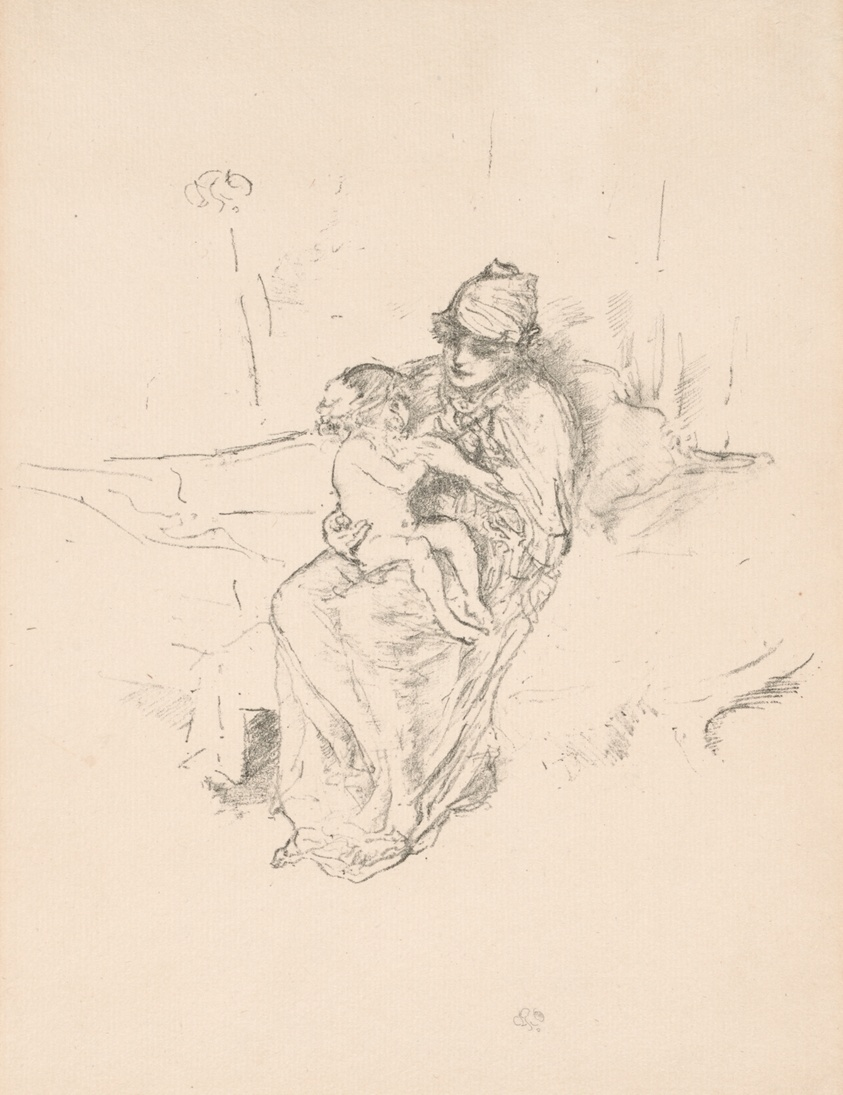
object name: Print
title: Mother and Child, No. 1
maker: James McNeill Whistler (American, 1834-1903)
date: 1891, printed 1895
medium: Transfer lithograph, with scraping and stumping, in black on cream laid paper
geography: United States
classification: transfer lithograph; lithograph; print; prints and drawing; paper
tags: mothers, children